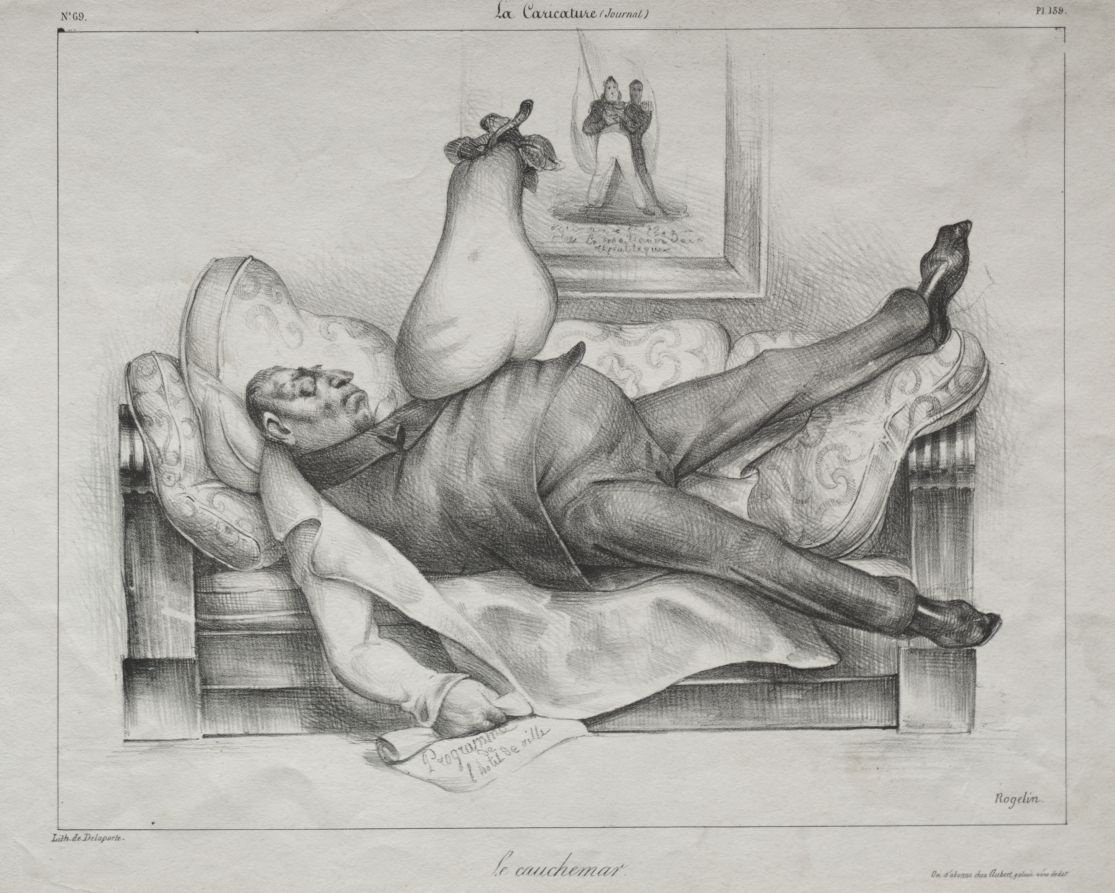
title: The Nightmare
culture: France, 19th century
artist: Honoré Daumier (French, 1808–1879)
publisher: Aubert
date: 1832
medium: lithograph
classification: Print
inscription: Below image, printed: Le cauchemar.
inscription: Verso, in pencil: TR 2733/1 / Le portrait a celui du general Lafayette Chari...(?) du 23 Fer 1832 / Charicatur has Daumier qui a depuis(?) d'abore(?) Rogelin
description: This print was published in the journal La Caricature (No. 69) as plate 139.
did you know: The man in the image is General Lafayette; the pear on top of him represents King Louis-Philippe, showing their uncomfortable relationship.